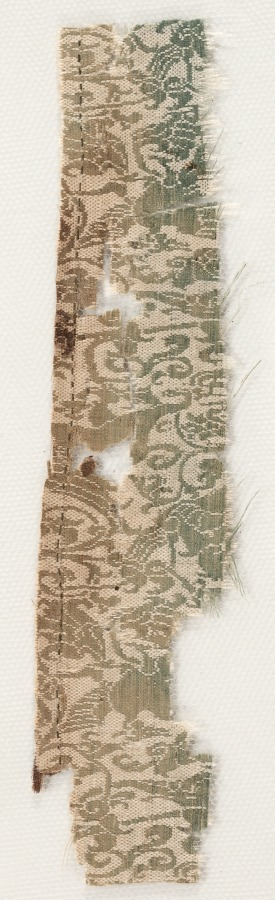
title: Fragment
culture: Egypt, Ayyubid, 12th century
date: 1100s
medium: tabby with supplementary weft; silk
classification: Textile